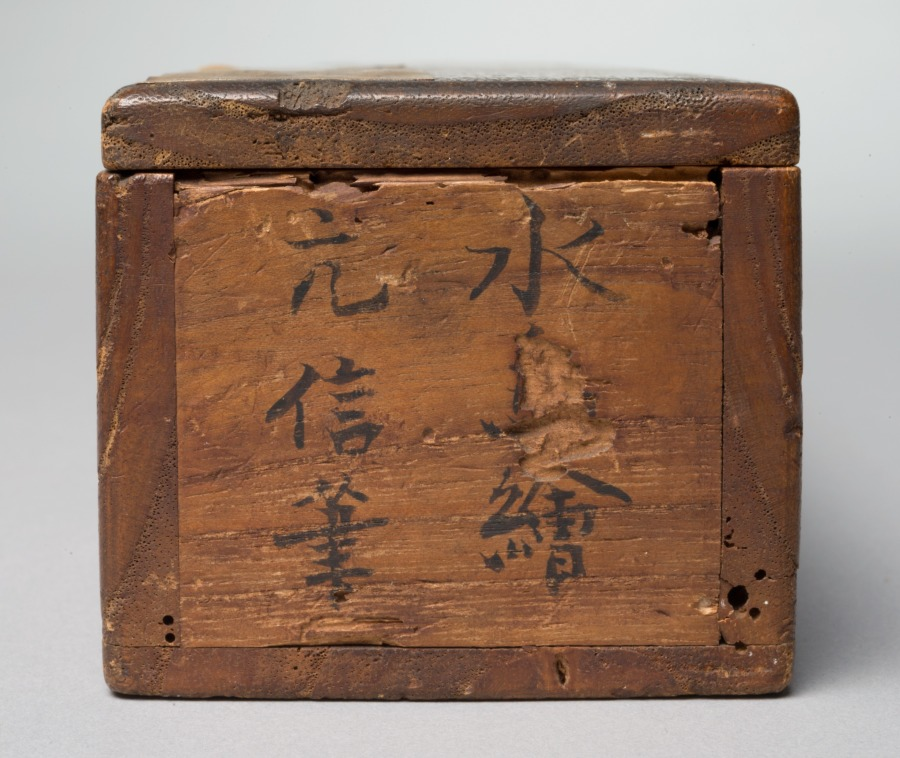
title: Ducks and Reeds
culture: Japan, Momoyama period (1573-1615) to Edo period (1615-1858)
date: early 1600s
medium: hanging scroll; ink on paper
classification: Painting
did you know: This painting was produced by a member of the Kano school.